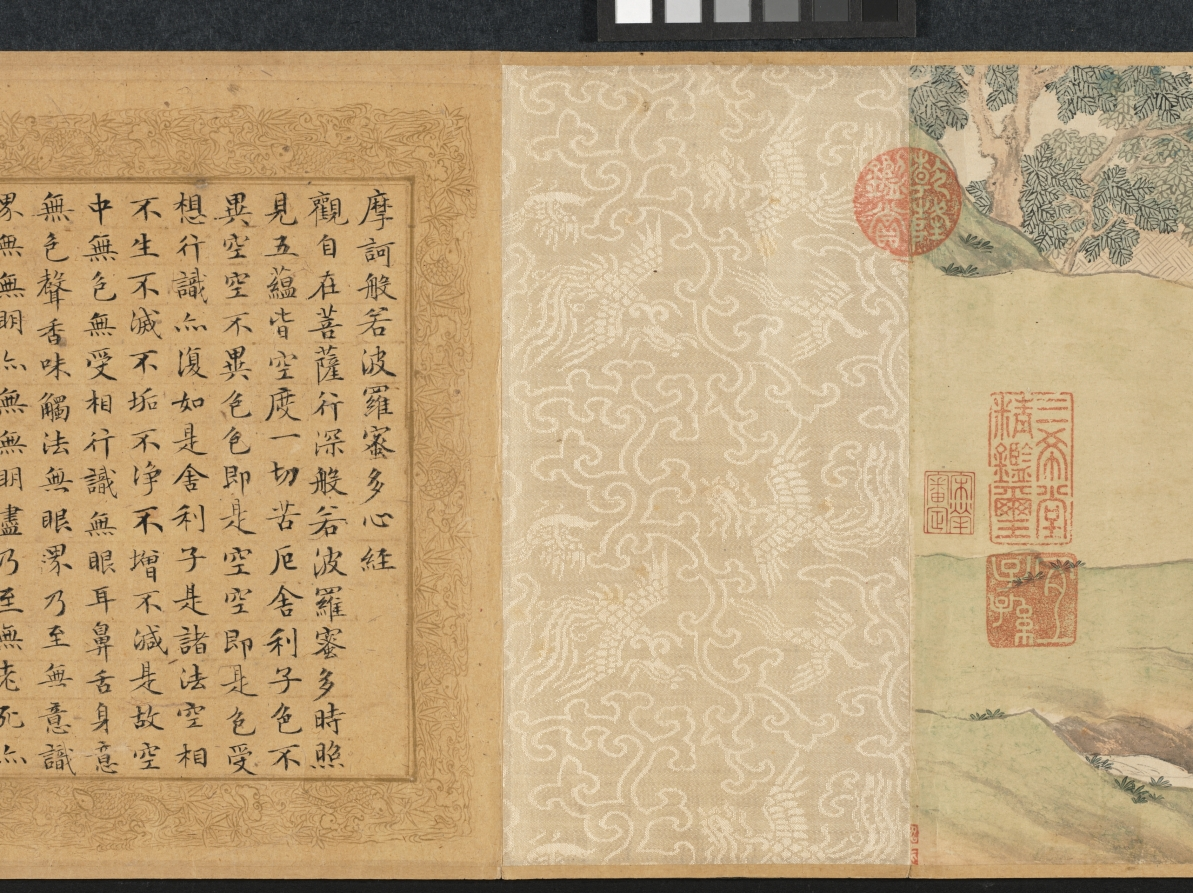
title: Zhao Mengfu Writing the Heart (Hridaya) Sutra in Exchange for Tea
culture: China, Ming dynasty (1368–1644)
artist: Qiu Ying (Chinese, 1494–1552)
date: 1542–43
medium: handscroll, ink and light color on paper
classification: Painting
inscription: Inscription accompanying text of "Heart" sutra, by Wen Zhengming 文徵明 (1470-1559): Zhengming 徵明, written in a boat at Kunshan 崑山, on the twenty-first day of the ninth month, in the renyin 壬寅 year, the twenty-first year of the Jiajing era [1542].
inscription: Colophon by Wang Shih-mou: Chou Yü-shün [Feng-lai] of K'un-shan was a scholarly, refined connoisseur of antiquities. He had acquired the poem written by Chao Ch'eng-chih [Chao Meng-fu] about the exchage of tea for Chao's calligraphy of the Prajna sutra. But the sutra itself, also written by Chao Meng-fu, is lost. He therefore asked Ch'iu Shih-fu [Ch'iu Ying] to do a painting and had Wen Cheng-ming, the artist-in-attendance, write the Hridaya Sutra in the "small, regular" style for replacement. Both works are so excellent that even Chao Meng-fu himself would certainly applaud if he should be reborn to see them. I, Shih-mou, had gotten possession of this scroll from the family of Chou Yü-shün, and since it was so wonderfully matched with one of the treasures in my collection. the Hridaya Sutra written by Chao Meng-fu for Priest Li in "running script," like the reuniting of two halves of a jade pi, I completed the scroll with the several colophons written for the "tea-exchange" poem. I did this because the painting of Ch'iu Ying and the calligraphy of Wen Cheng-ming are definitely masterpieces by themselves with absolutely no need to depend on any of the colophons written for the Chao Meng-fu poem. Furthermore, the two sons of Wen Cheng-ming, Shou-ch'eng [Wen P'eng] and Hsiu-ch'eng [Wen Chia]. have each written a colophon explaining the reason for replacing the calligraphy. As their writings are both acceptable for high standard, I didn't want to throw them away. [So by separating these into two scrolls] I was able to get two complete works of art in one clever stroke. I was quite pleased with myself, and hope that those who see this scroll shall not get suspicious because of the missing colophons. Wang Shih-mou wrote in his Jih-sun-chai study, on the first day of the tenth month, in the chia-shen year of the Wan-li era [1584].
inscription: Colophon by Wen P'eng: I-shao [Wang Hsi-chi] wrote in exchange for a flock of geese. Su Tung-po wrote in exchange for meat. Both episodes have become legends of a thousand years. Sung-hsüeh [Chao Meng-fu] "teased" Priest Kung for tea, and the story was immediately immortalized in the poems by all the famous scholars of the times. Indeed, how could one say his humor and elegance are not equal to the ancient worthies? Unfortunately, the poetry has survived but the writing of the sutra is lost. Yü-shün [Chou Feng-lai] therefore asked my father to make up the writing and so here is the complete work of art. Respectfully inscribed by Wen P'eng in the mid-summer of 1543.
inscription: Colophon by Wen Chia: Sung-hsüeh [Chao Meng-fu], in exchanging tea leaves for his writing of the Prajna, had put himself in the company of Yu-chün [Wang Hsi-chih] who exchanged geese for his writing of the Huang-t'ing sutra [the Yellow Chamber, or the Wai-ching ching, a Taoist text attributed to the Yellow Emperor]. However, was this romantic and cultivated gesture really intended for such small things? Actually, he was only proud that the excellence of his calligraphy had made him worthy to be the successor of the Ch'in Dynasty master. Since, very unfortunately, Chao Meng-fu's writing [of the Prajna] was already lost, my father therefore agreed to replace it, and did the calligraphy in the style of the Yellow Chamber. In addition, Yu-shün [Chou Feng-lai] had asked Mr. Ch'iu Shih-fu [Ch'iu Ying] to do a painting of the sutra writing story in the style of Li Lung-mien at the head of the scroll. Now it would seem the entire episode should go down in history for immortality. Respectfully recorded by Wen Chia, on the eighth day of the eighth month, in the year of k'uei-mao [1543]. trans. WKH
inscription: 4 colophons and 23 seals: 1 colophon, dated 1543, and 2 seals of Wen Peng (1498-1573); 1 colophon, dated 1543, and 2 seals of Wen Chia (1501-1583); 1 colophon, dated 1584, and 3 seals of Wang Shih-mou (1536-1588); 2 seals of Chou Feng-lai (16th c.); 3 seals of Sung Lo (1634-1713); 5 seals of the Ch'ien-lung emperor (r. 1736-95); 1 colophon, dated 1902, and 1 seal of Fei Nien-tz'u (1885-1905); 4 seals of Wan-go H. C. Weng (b. 1918); 1 seal unidentified.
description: The Yuan dynasty calligrapher Zhao Mengfu (1254–1322) is said to have transcribed the Heart Sutra for a certain priest named Li in exchange for tea. Later, during the Ming dynasty, the professional painter Qiu Ying from Suzhou painted this scene for his patron. Here, Zhao Mengfu holds a brush and has a piece of paper laid out before him. On the table is an ink stone, an ink stick, and a small water dropper. Drops of water would dissolve the ink stick into liquid ink when it was ground on the flat square stone.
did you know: Qiu Ying was born to a peasant family, but his natural talent led him to a successful career as a professional painter with wealthy patrons.